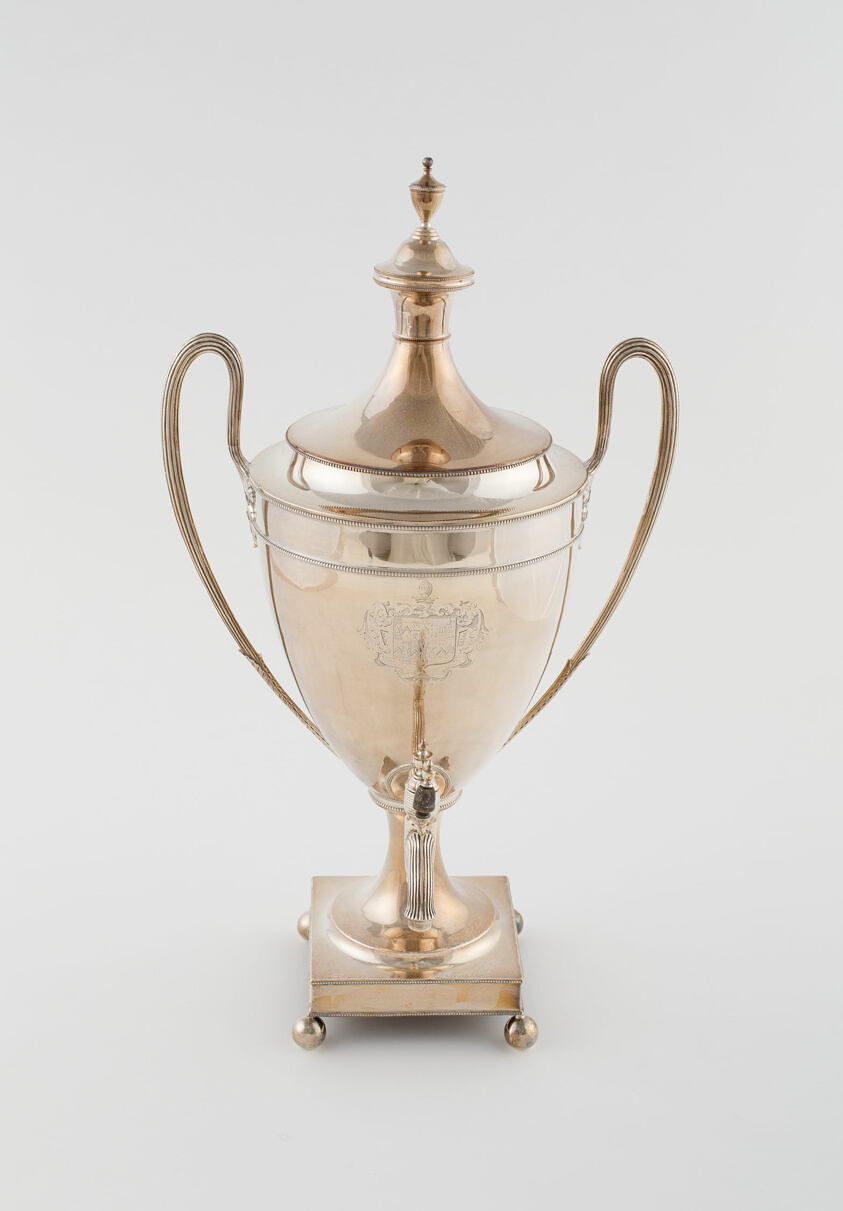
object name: Metalwork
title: Coffee Urn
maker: Peter and Ann Bateman; English, active 1792; London, England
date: 1792/93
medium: Silver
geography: London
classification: silver; metalwork; european decorative arts